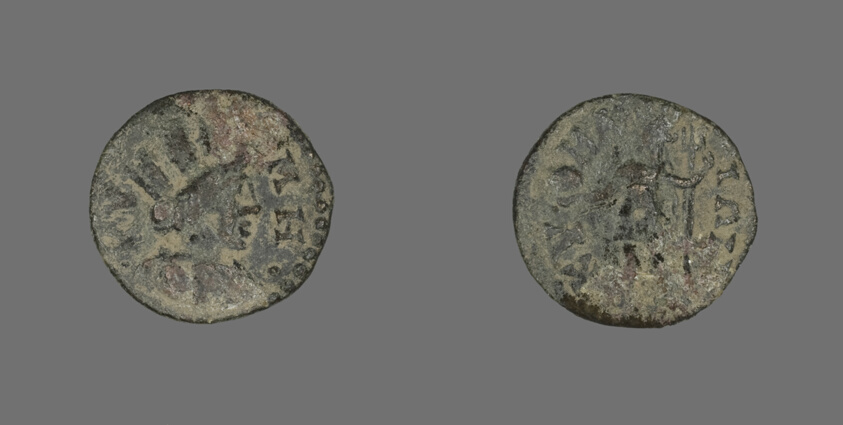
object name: Coin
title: Coin Depicting the Goddess Tyche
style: roman (ancient, style or period), ancient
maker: Roman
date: 253-268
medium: Bronze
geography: Roman Empire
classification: coin; ancient art